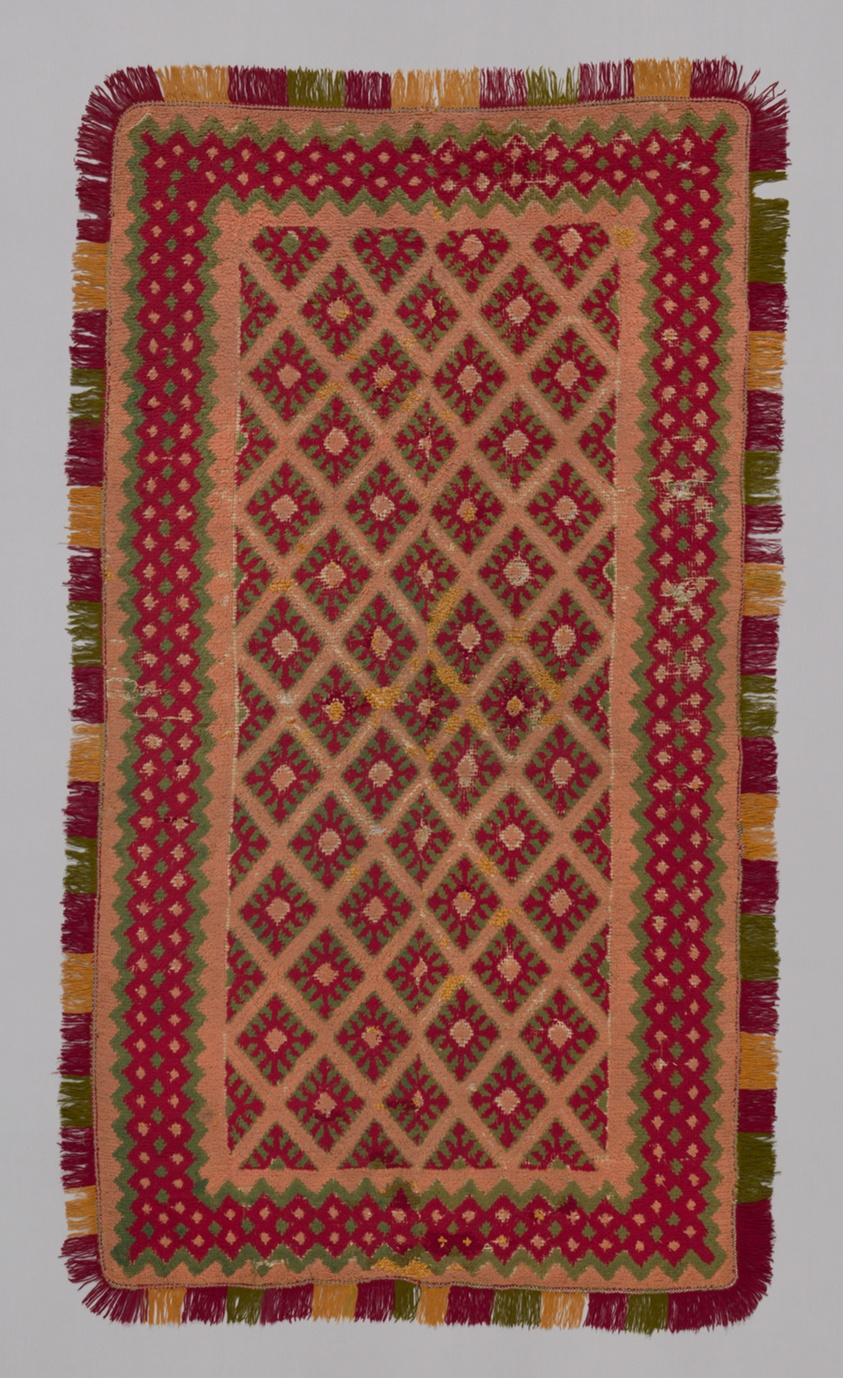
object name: Textile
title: Carpet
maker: Spain, Alpujarra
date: Late 18th/19th century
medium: Linen, plain weave with supplementary weft loop uncut pile; edged with wool, warp-faced plain weave with extended weft cut fringe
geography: Spain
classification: weaving - carpet; textile